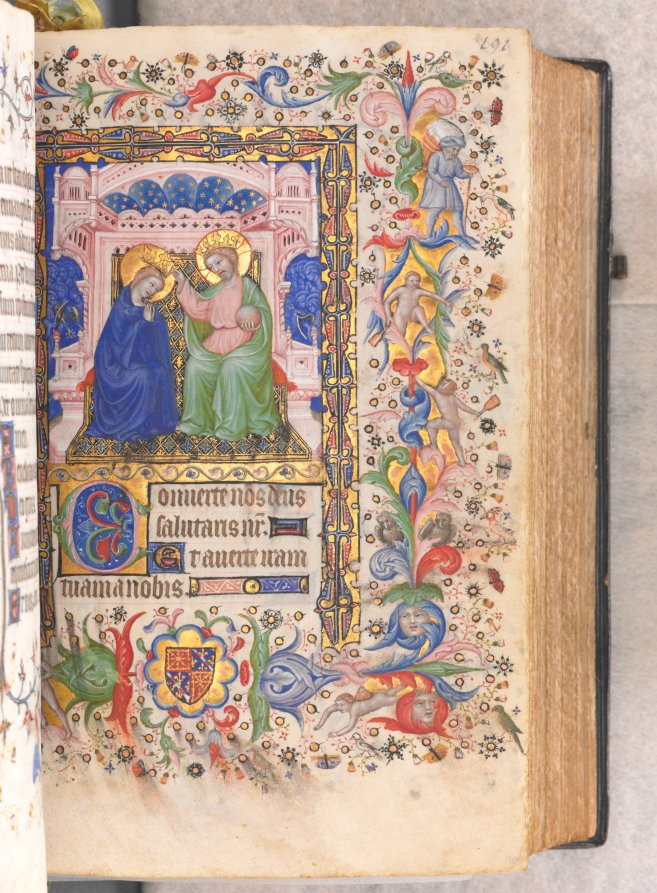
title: Hours of Charles the Noble, King of Navarre (1361-1425): fol. 96r, Coronation of the Virgin (Compline)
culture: France, Paris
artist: Master of the Brussels Initials and Associates (French)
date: c. 1405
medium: ink, tempera, and gold on vellum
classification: Bound Volume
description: This precious volume was obviously highly prized by its owner, the French-born King of Navarre, who had his coat of arms painted on no less than twenty folios. Rather than directly commissioning this manuscript from a specific workshop, it seems that Charles the Noble acquired his book of hours -- perhaps ready-made for the luxury market -- while on a trip to Paris in 1404-05. A collaborative effort, six painting styles are evidenced within the pages of this codex, those of two Italians, two Frenchmen, and two Netherlanders. The painter who was responsible for the planning and decoration of the book, and who produced seventeen of the large miniatures, was a Bolognese artist known as the Master of the Brussels Initials. His principal assistant, responsible for most of the borders, was a Florentine who signed his name "Zecho" da Firenze on folio 208 verso.